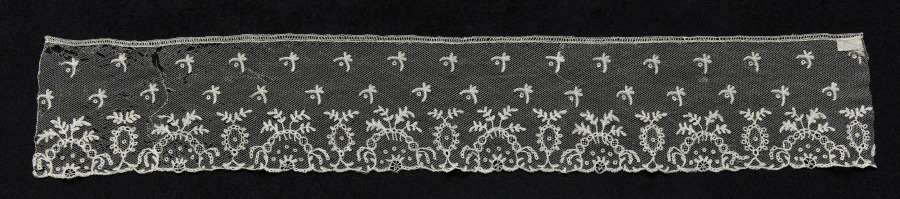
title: Lace Edging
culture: Flanders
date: 1780–1899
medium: Linen: bobbin lace (Point d'Angleterre)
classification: Lace